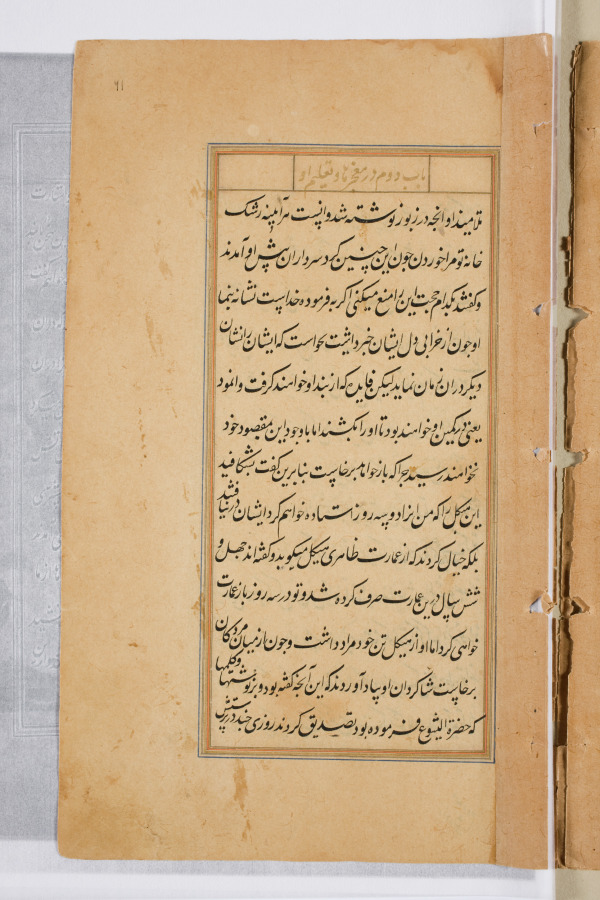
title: Text page from a Mirror of Holiness (Mir’at al-quds) of Father Jerome Xavier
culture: Mughal India, Allahabad, made for Prince Salim (1569–1627)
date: 1602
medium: Ink and gold on paper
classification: Manuscript